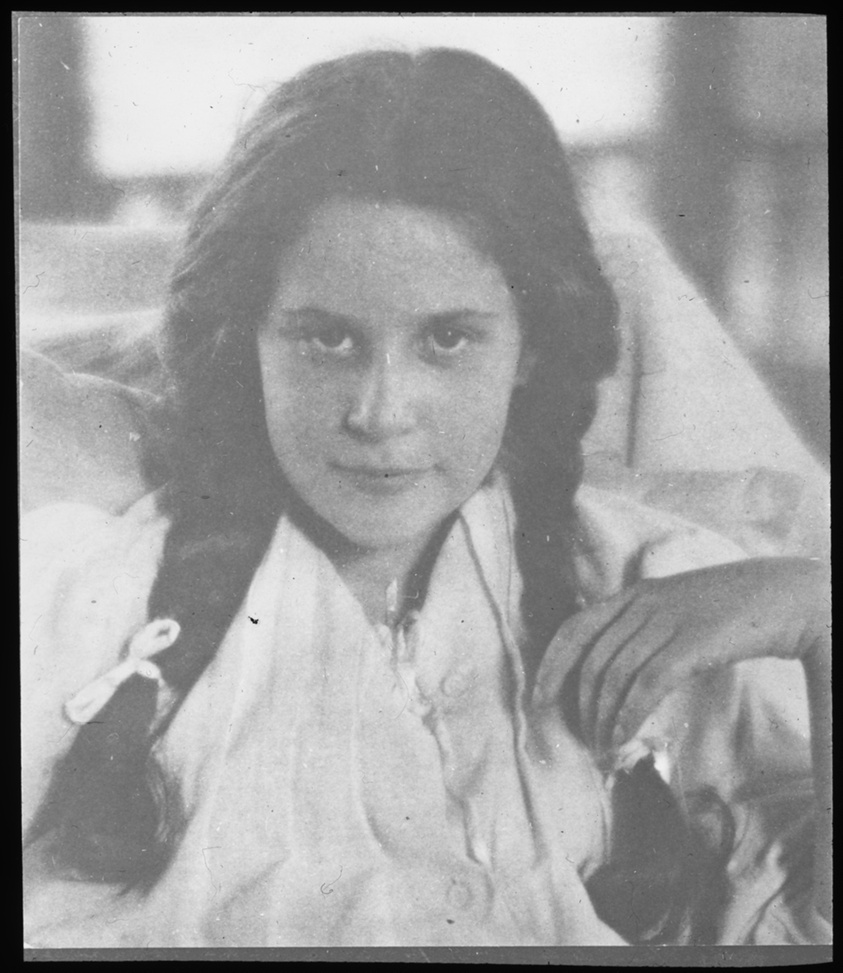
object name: Photograph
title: Kitty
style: Pictorialism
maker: Alfred Stieglitz (American, 1864–1946)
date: c. 1908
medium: Lantern slide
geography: United States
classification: lantern slide (glass); negative/transparency; photography; photograph